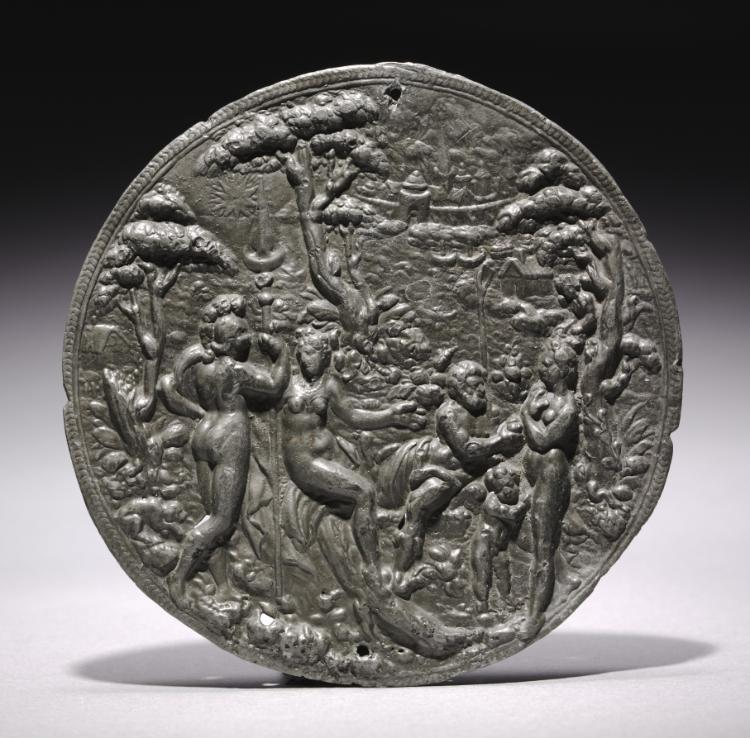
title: Judgment of Paris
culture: Germany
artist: Hans Jamnitzer (German, 1538–1603)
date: c. 1560–1568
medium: lead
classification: Sculpture